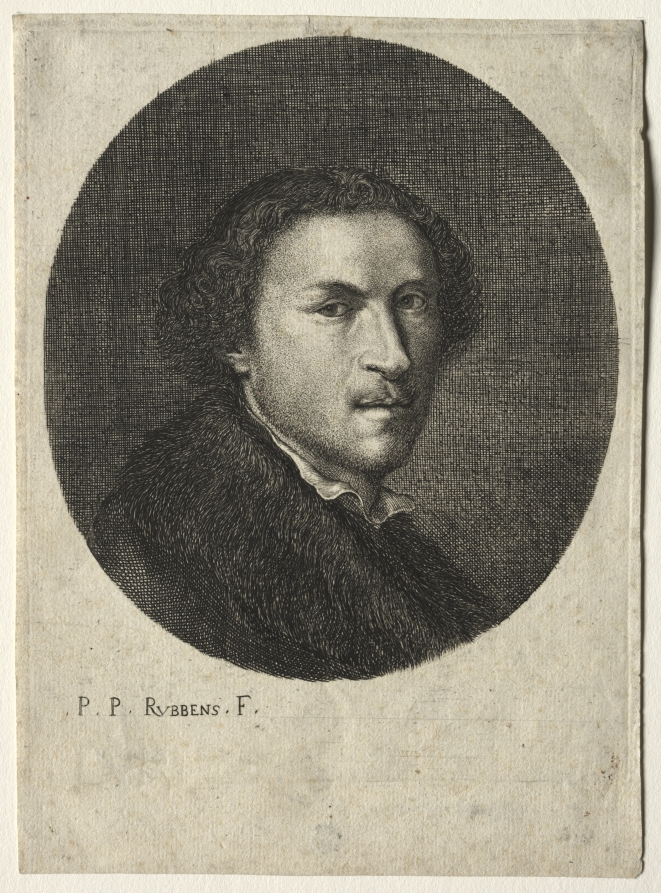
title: Portrait of an English Minister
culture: Flanders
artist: after Peter Paul Rubens (Flemish, 1577–1640)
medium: etching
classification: Print